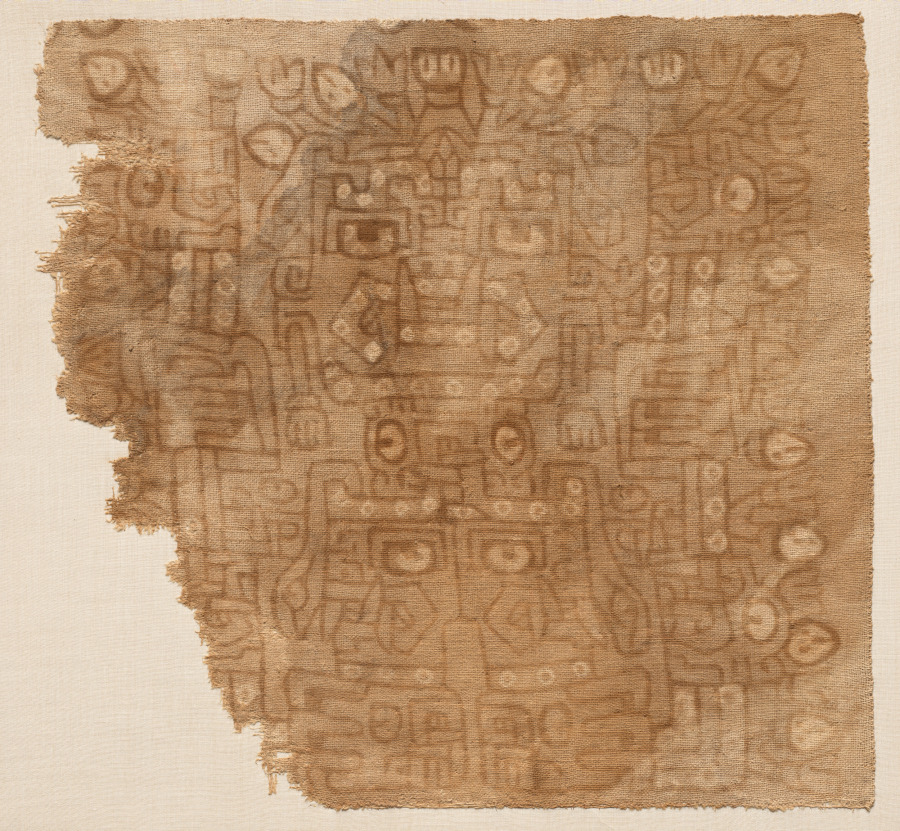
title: Textile Fragment with Cotton Goddess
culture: Andes, south coast, Ica Valley?, Chavín style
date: 800–500 BCE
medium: Cotton, pigments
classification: Textile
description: The figure painted on this fragment represents a female deity with a large, fanged mouth. Further fanged heads occur on the chest, legs, feet, waist, and staffs of authority she holds. Edging both the staffs and the top of the head are white cotton bolls that have caused the deity to be dubbed the Cotton Goddess and associated with nature’s fertility.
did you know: The fragment comes from a larger textile, perhaps a ceremonial hanging.